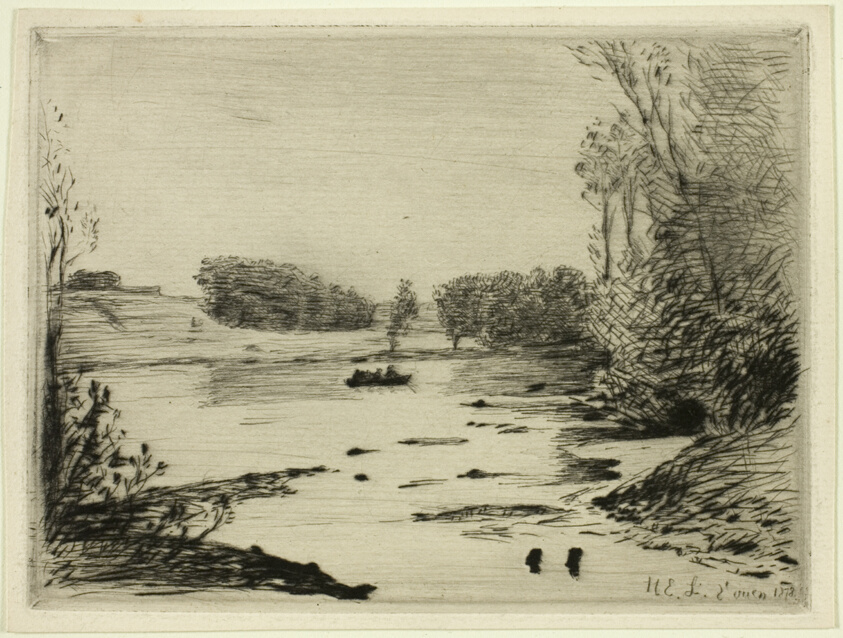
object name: Print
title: River Scene with Rowers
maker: Henri-Emile Lessore (French, 1830-1895)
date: 1878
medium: Drypoint on cream laid paper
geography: France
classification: drypoint; print; prints and drawing